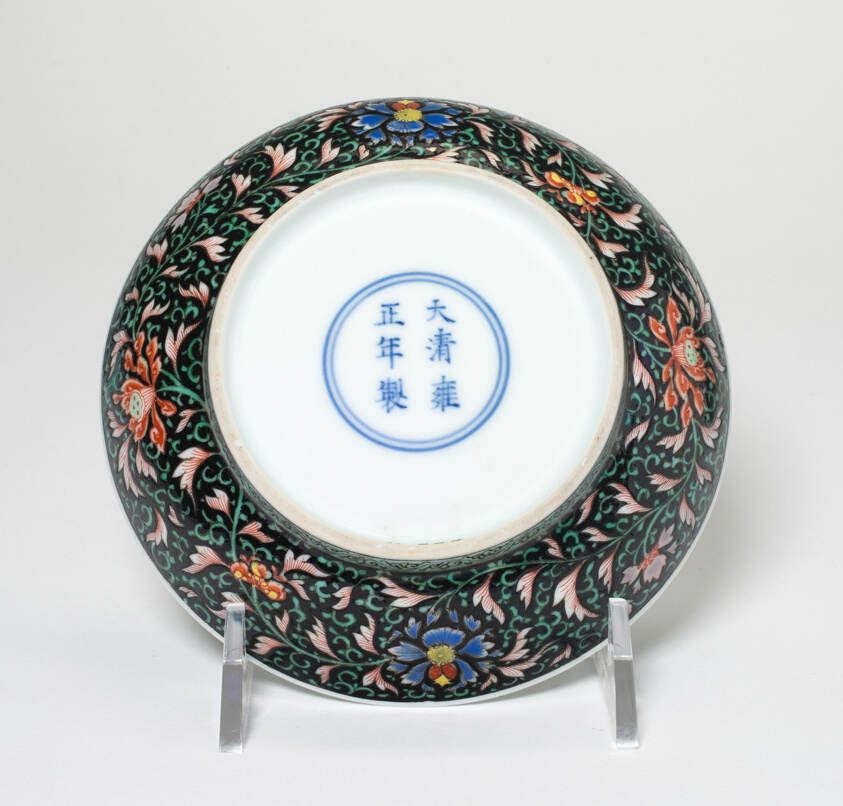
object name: Vessel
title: Small Saucer with Red, Blue, Green, Yellow Scroll of Camellias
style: Chinese (culture or style)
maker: China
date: Qing dynasty (1644–1911), Yongzheng reign mark and period (1723–1735)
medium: Porcelain painted in overglaze enamels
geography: China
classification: porcelain; asian art; ceramics; vessel